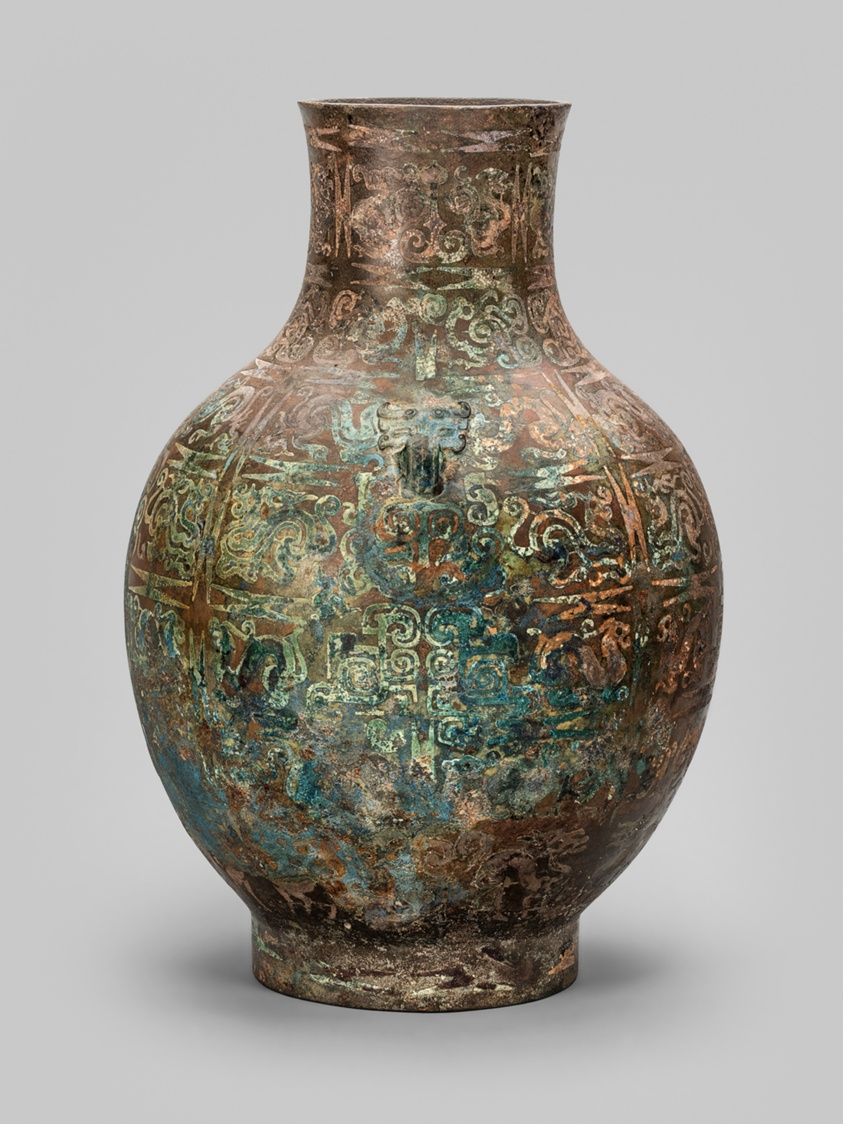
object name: Vessel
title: Jar (hu)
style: Chinese (culture or style)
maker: China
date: Eastern Zhou dynasty, Warring States period (475–221 B.C.)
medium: Bronze inlaid with copper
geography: China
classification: bronze; metal; vessel; asian art